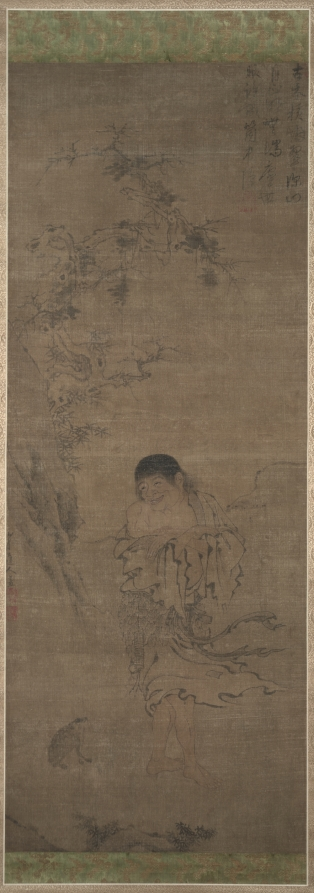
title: Liu Haichan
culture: China, Yuan dynasty (1271-1368)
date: 1300s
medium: Hanging scroll; ink and color on silk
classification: Painting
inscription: Inscribed in upper right corner: The old tree has its green shrouded in mist/ In the depth of the mountain the moon is bright/ By no means could the eyes of the dusty world/ Understand these particular feelings. Shan-yüeh tao-jen [seal] Shan-yüeh (?)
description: Liu Haichan is a Daoist immortal sometimes included in the Eight Immortals. He is often shown as a young man wearing bangs across his forehead. He was said to have lived during the Five Dynasties period (907–979) and left his position as a grand councilor to become a hermit. Usually depicted carrying a string of coins and accompanied by a three-legged toad, Liu Haichan became a god of wealth and his toad symbolizes wealth as well. In this scroll, Liu is teasing the three-legged toad with a string of coins tied to his waist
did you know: Because the immortal Liu Haichan is usually depicted with bangs, his eponym, liúhǎi 劉海, means "bangs" in Chinese.